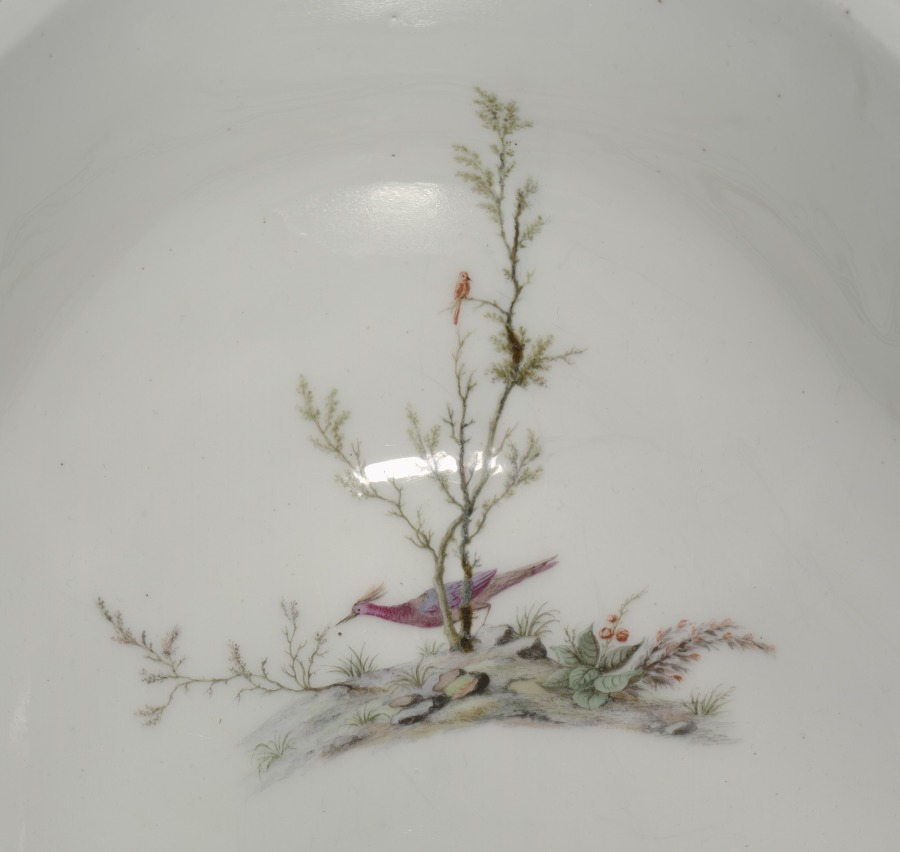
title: Covered Tureen (Terrine ancienne or Terrine ordinaire)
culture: France, Vincennes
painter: attributed to Louis-Denis Armand (French, active c. 1745–1783)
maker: Vincennes Porcelain Factory (France, 1740–56)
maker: probably by Jean-Claude Duplessis le Père (French, 1690–1774)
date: c. 1752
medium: soft-paste porcelain with enamel and gilt decoration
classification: Ceramic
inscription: [Interlaced foliate 'L's surmounted by a fleur-de-lys (indicating royal commision), in blue]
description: The intricately painted birds that decorate this tureen are the work of Louis-Denis Armand. Armand was known for his depictions of birds and landscapes, a specialty that may have come from his work as a painter of lacquered furniture with similar compositions. This tureen was likely designed by master goldsmith Jean-Claude Duplessis who began working as an artistic director at the Vincennes Porcelain Factory in 1748.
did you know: This object was manufactured in soft-paste porcelain, a material used by many European porcelain factories before they were able to emulate the hard-paste porcelain of China and Japan.